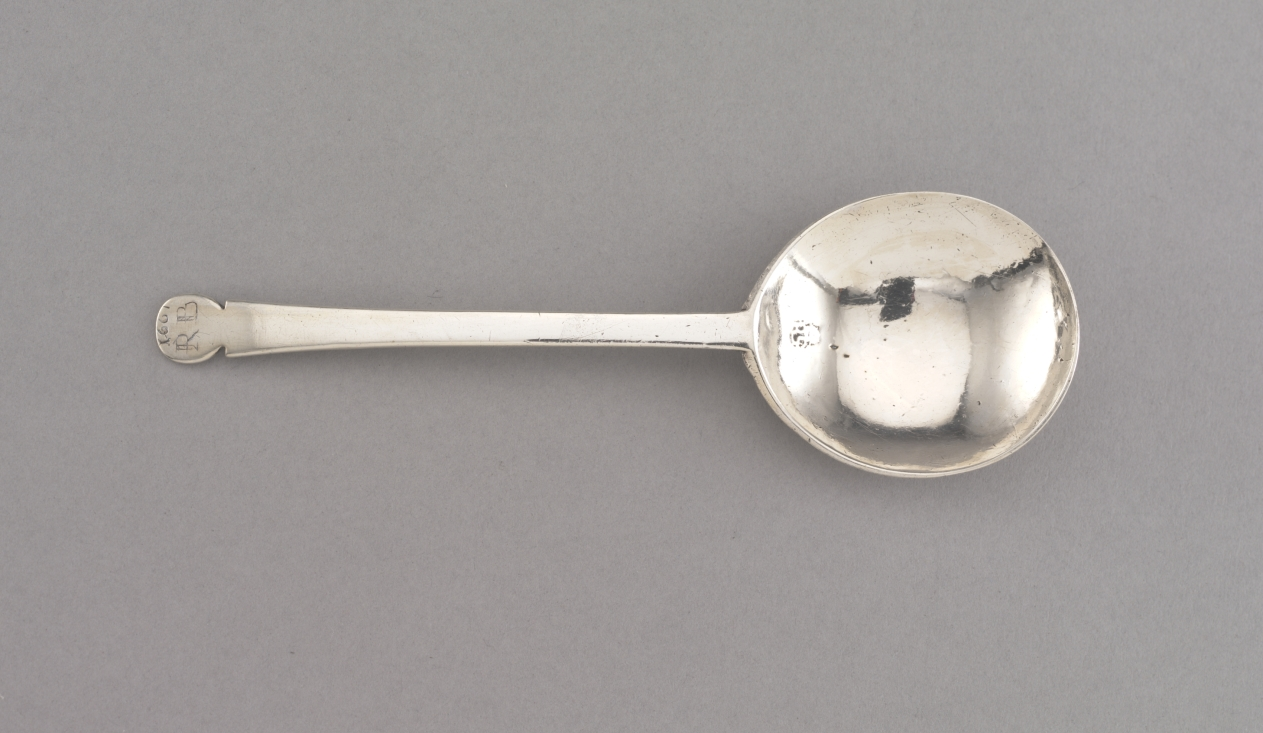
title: Spoon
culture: America, Massachusetts, Boston, 17th century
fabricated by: John Hull (American, 1624–1683)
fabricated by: Robert Sanderson (American, 1609–1693)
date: 1661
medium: silver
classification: Silver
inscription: engraved: 1661 over block initials RB on top of handle end, and block initials RS over IS (perhaps IB) on back of handle end.